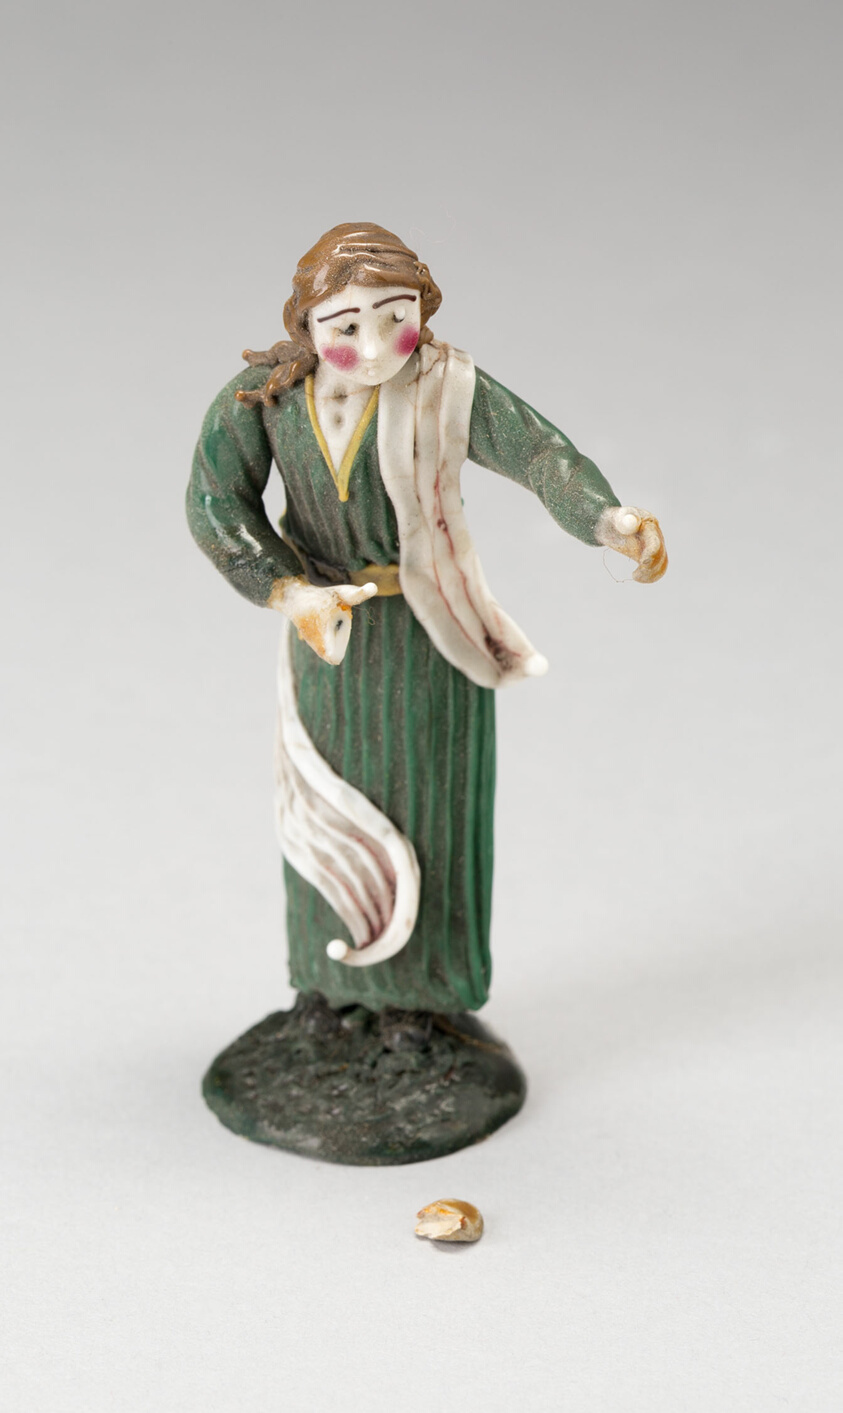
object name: Glass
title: Girl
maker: Nevers, France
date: 18th century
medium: Glass; lampwork (verre de Nevers), metal armature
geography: France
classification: decorative object/ornament; lampwork; glass; european decorative arts